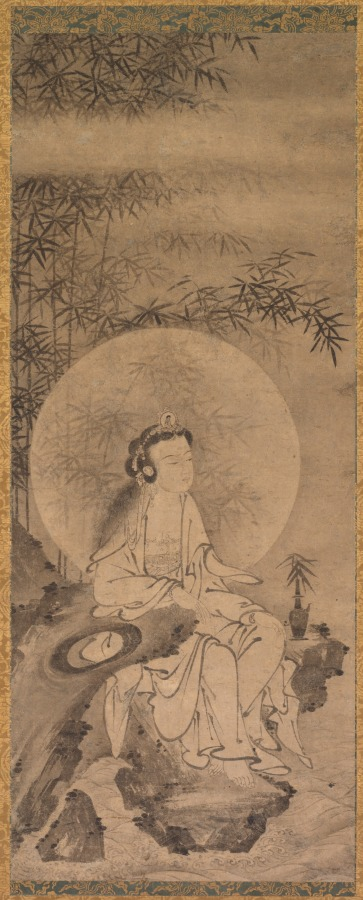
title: White-Robed Guanyin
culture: China, Southern Song dynasty (1127-1279)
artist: attributed to Zhang Yuehu (Chinese, active 1200s)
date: late 1200s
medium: Hanging scroll; ink on paper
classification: Painting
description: The figure here sits on a rocky elevation representing Potalaka in the Southern Sea, Avalokitesvara’s island home. A vase with a bamboo sprig holds pure water, the nectar of life. Bamboo shines through the figure’s halo, a way of seeing the illusionary world through the Buddhist truth. Avalokitesvara (Guanyin in Chinese), the bodhisattva of compassion, was integrated into the Chan Buddhist canon of venerated beings. In this context, the bodhisattva is often depicted in its female manifestation as the White-Robed Guanyin. The worship of the feminine White-Robed Guanyin has its origins on Mount Tianzhu in Hangzhou, where Qian Liu (852–932), ruler of the Wuyue kingdom, established the Upper Tianzhu Monastery to venerate her image.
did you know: As an artist, Zhang Yuehu was better known in Japan than in his own country.